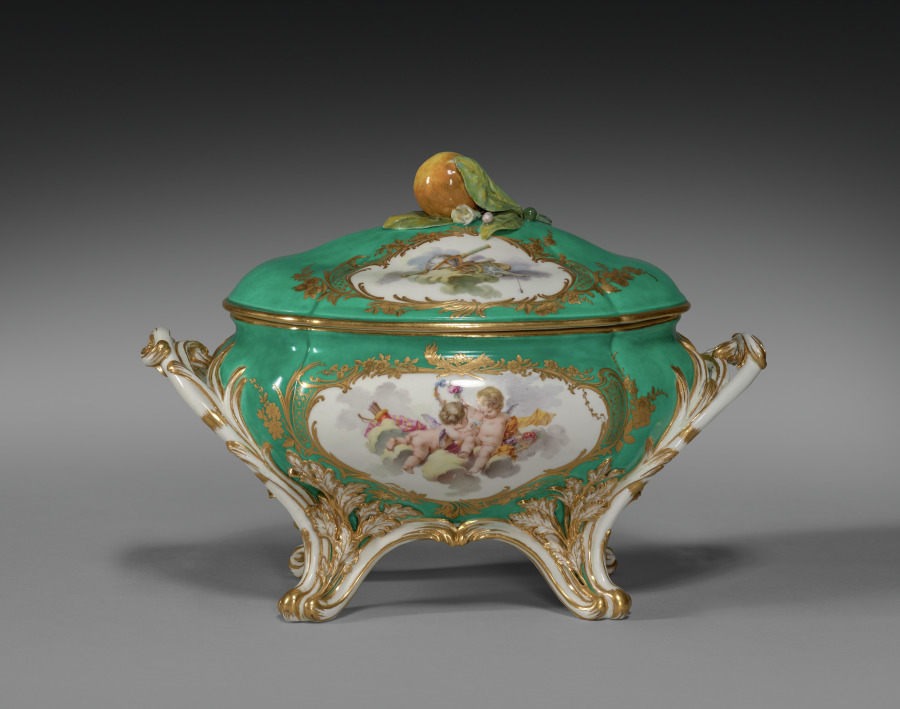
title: Covered Tureen (Terrine du roi)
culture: France, Sèvres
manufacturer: Sèvres Porcelain Factory (French, est. 1756)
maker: attributed to Charles Nicolas Dodin (French, 1734–1803)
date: 1756–57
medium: soft-paste porcelain with enamel and gilt decoration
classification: Ceramic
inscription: [Interlaced L's]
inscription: [Date letter 'D' (in cursive with a dot on either side)]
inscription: [Incised 'b']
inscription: [Incised '6']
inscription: [Inventory numbers in red enamel]: "r.u./710" [base of tureen]; "r.u./710a" [on lid]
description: This tureen’s striking green background, or fond vert, was a major advancement for the Sèvres Porcelain Factory, known for their innovation in and mastery of color. Traditionally the largest, most expensive item in an 18th-century French dinner service, this tureen was part of a porcelain dining set presented to King Frederick V of Denmark by French King Louis XV in 1758.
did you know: French King Louis XV was a great patron of the decorative arts; he acquired the Sèvres Porcelain Factory in 1759.